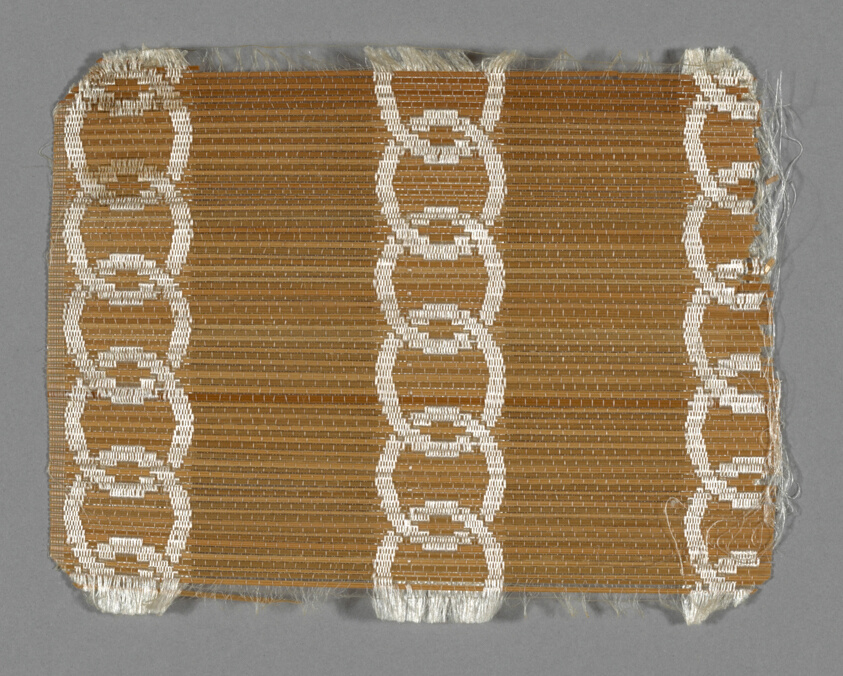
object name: Textile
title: Sample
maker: France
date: 19th century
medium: Silk and straw, plain weave self-patterned by areas of twill interlacings over plain weave and layers of plain weave; woven on loom with Jacquard attachment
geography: France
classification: textile; weaving